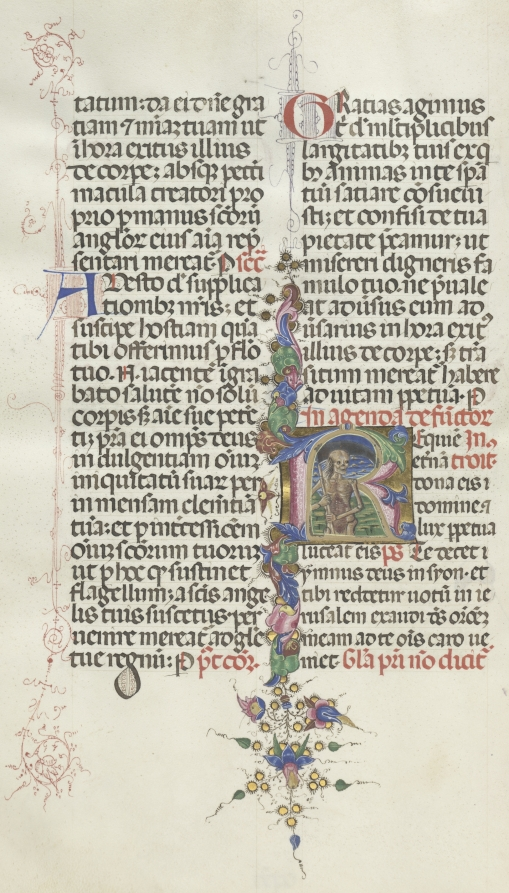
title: Missale: Fol. 387v: Death represented as a Skeleton with a Sickle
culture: Italy, Perugia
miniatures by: Bartolommeo Caporali (Italian, c. 1420–1503)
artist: assisted by Giapeco Caporali (Italian, d. 1478)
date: 1469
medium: ink, tempera and burnished gold on vellum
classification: Bound Volume